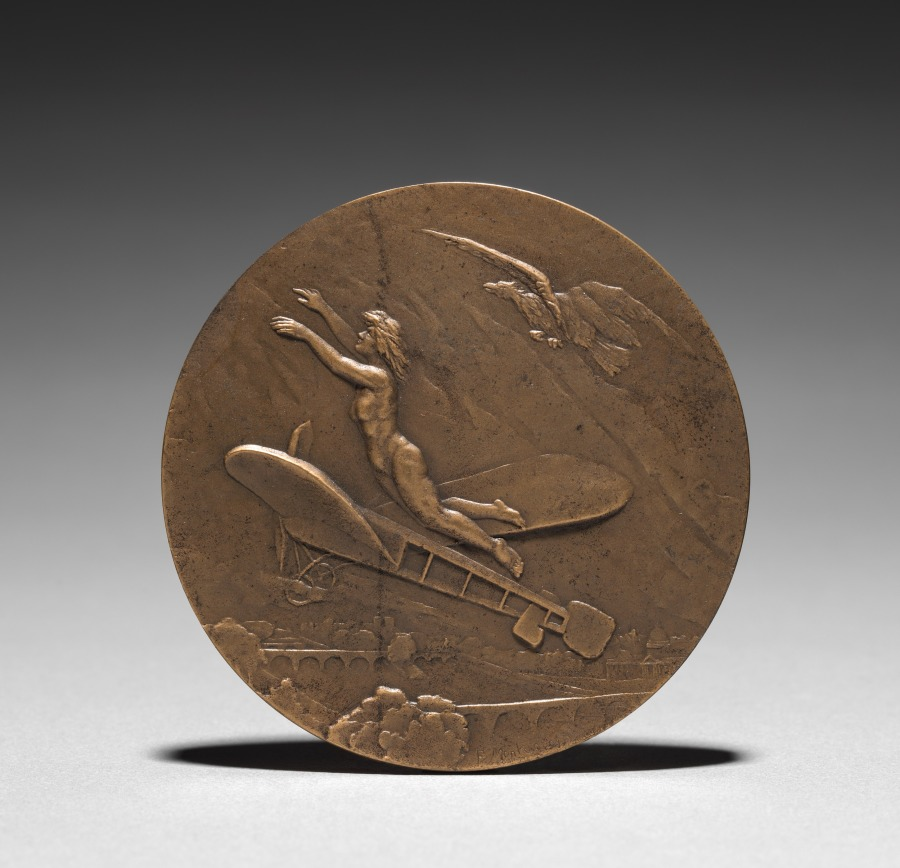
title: Medal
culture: France, 19th century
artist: F. Montagny (French)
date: c.1920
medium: bronze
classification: Metalwork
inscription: inscribed: F. Montagny.